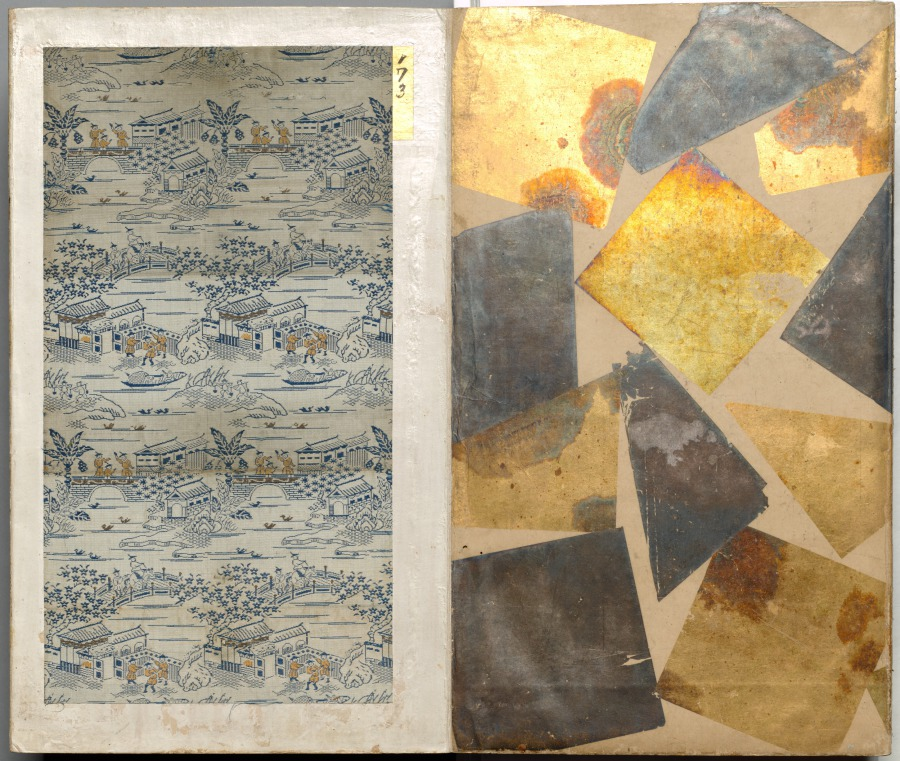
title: Album of Textile Samples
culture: Japan, Edo period (1615–1868)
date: 1600s-1700s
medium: silk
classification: Textile